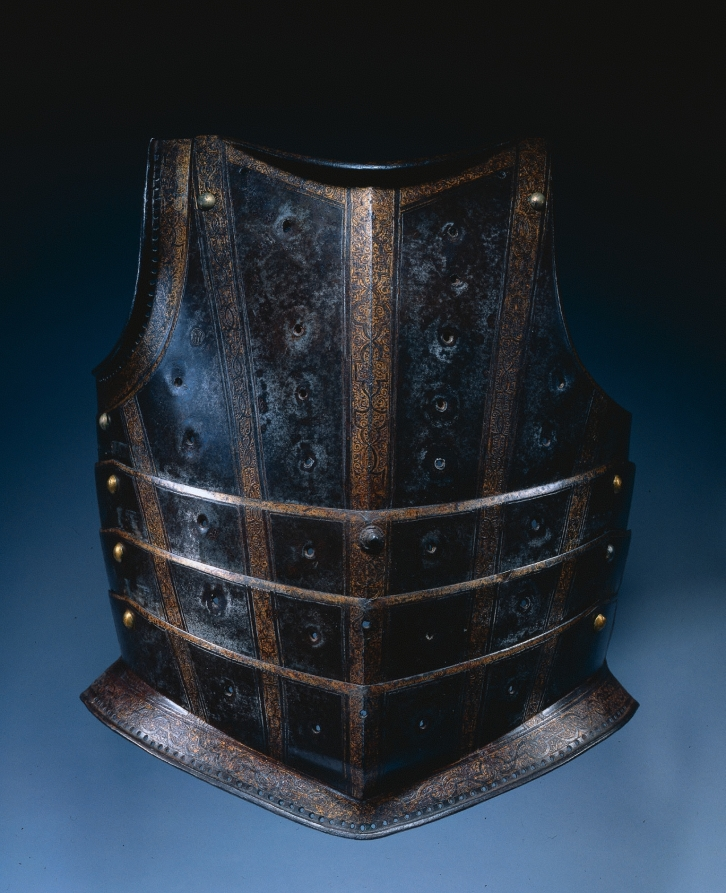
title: Breastplate from Hussar's Cuirass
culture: Germany, Augsburg or Hungary, 16th century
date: c. 1580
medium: Steel (originally blued, now russet), etched and gilded strapwork bands;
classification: Arms and Armor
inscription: TAMGA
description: This style of breastplate, with its numerous articulating lames, was probably used by a Hungarian hussar, a type of light cavalryman. The steel plates were originally blued-now turned russet-and etched and gilded with strapwork bands. The rows of vertical holes once provided gilt-brass settings for stones or glasspaste jewels. The effect would have suggested the semi-oriental costume and armor of the Near East favored by Polish and Hungarian armies of the late Renaissance.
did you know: The breastplate’s contours, like the ridge down the center, were designed to deflect arrows and other projectiles.